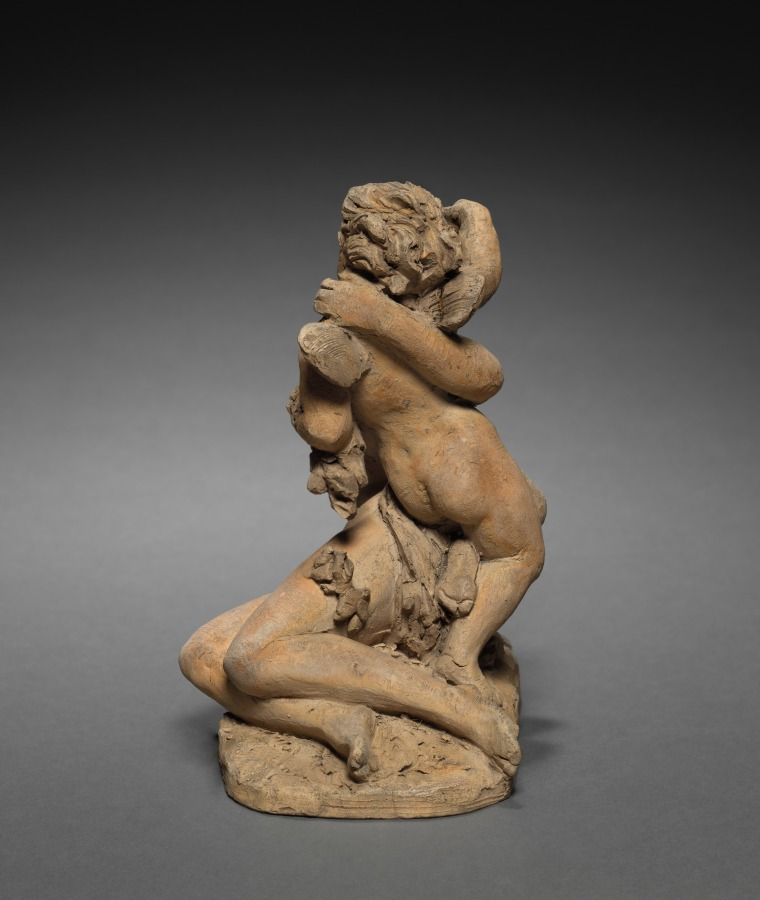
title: Venus and Cupid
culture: France, 19th century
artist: Jean-Jacques Feuchère (French, 1807–1852)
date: c. 1840–1850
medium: terracotta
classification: Sculpture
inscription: in ligature incised into base at front right corner: "Feuchere"; below are some marks that might be a date, but are illegible.